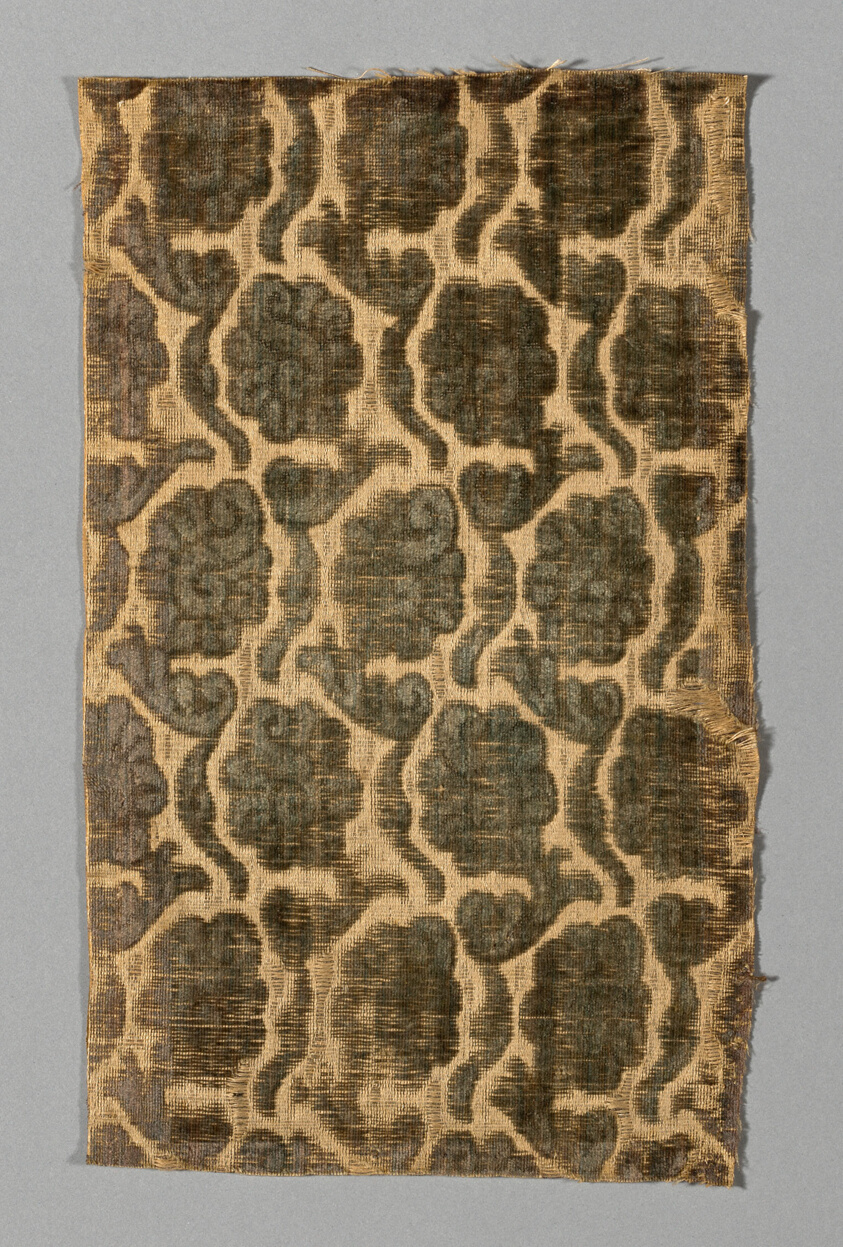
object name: Textile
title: Fragment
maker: Italy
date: Early 17th century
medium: cisele voided satin velvet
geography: Italy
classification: textile; weaving - velvet; weaving